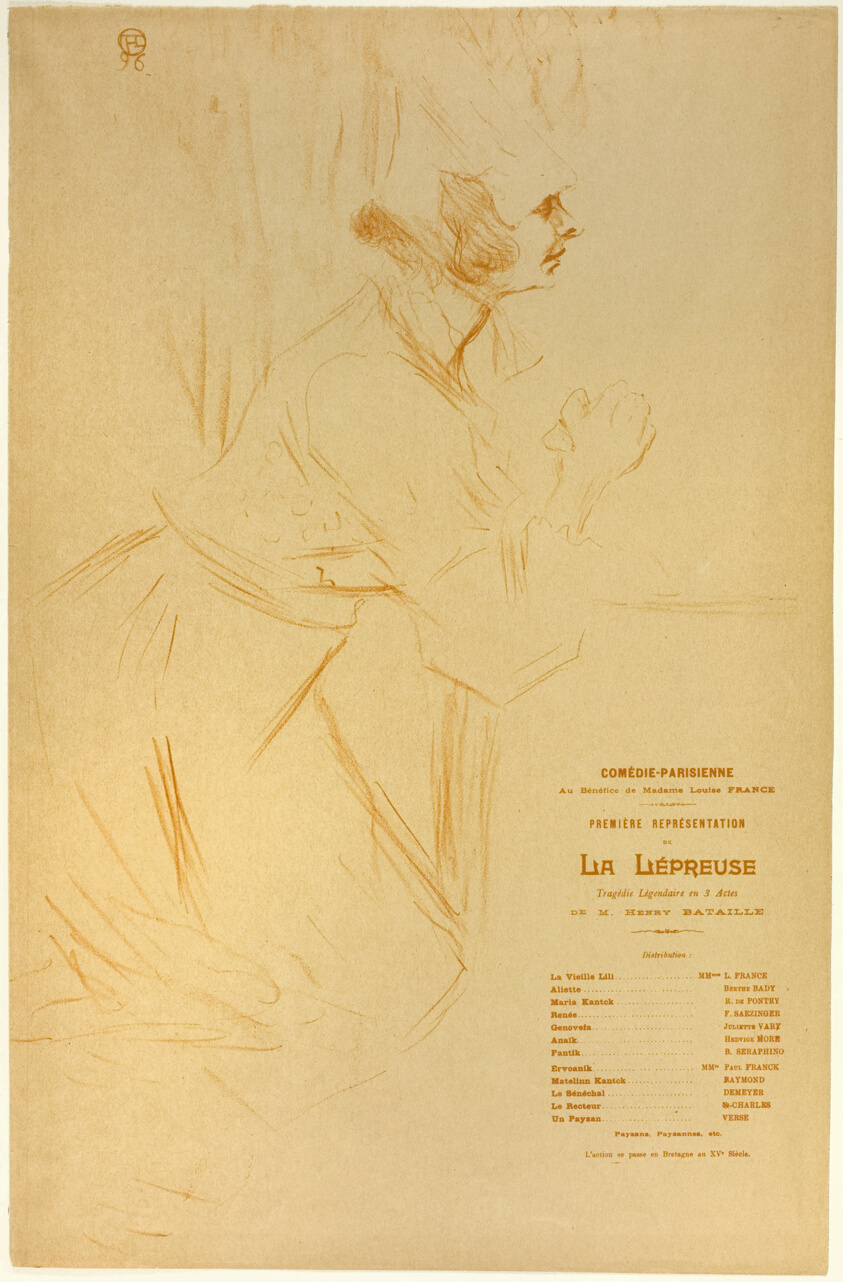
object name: Print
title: Program for La Lépreuse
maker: Henri de Toulouse-Lautrec (French, 1864-1901)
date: 1896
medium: Color lithograph on tan wove paper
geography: France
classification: lithograph; print; prints and drawing